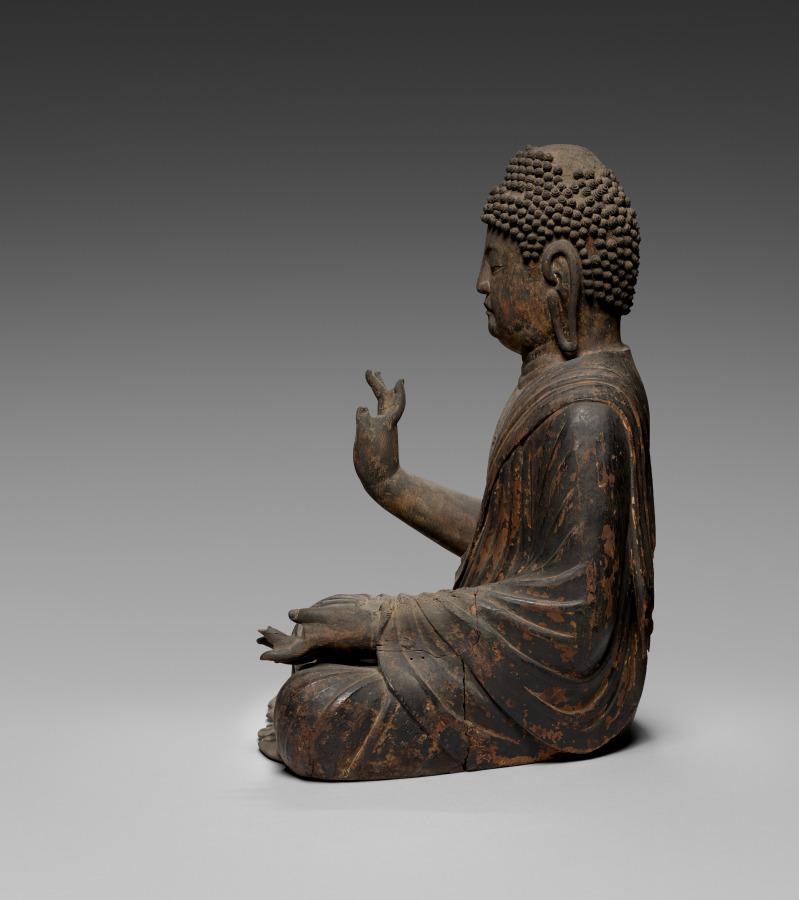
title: Shakyamuni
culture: Japan, Heian period (794–1185)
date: c. 900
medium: wood with lacquer and traces of color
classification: Sculpture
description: This image of Shakyamuni, the Buddha, or “awakened one,” who lived during the 500s or 400s BCE, is carved from one piece of wood. The distinctive pattern of thick, raised garment folds is characteristic of Japanese Buddhist sculpture of the 800s and 900s. Shakyamuni’s elongated ears and curled hair are among the physical attributes described in sacred texts that distinguish him as a Buddha.